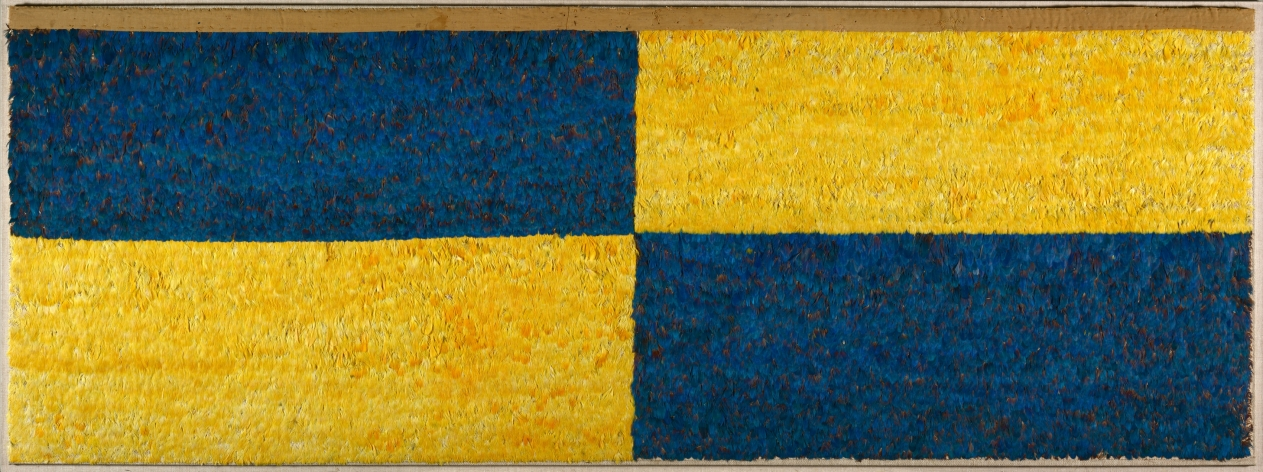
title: Feathered Panel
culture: Peru, Far South Coast, Pampa Ocoña, 7th-10th century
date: 600–900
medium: Papagayo macaw feathers knotted onto strings and stitched to cotton plain-weave cloth; camelid fiber plain-weave cloth upper tape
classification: Textile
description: Of all the luxury textile types made in the ancient Andes, feathered cloth was one of the most esteemed. This panel may come from a buried offering that contained more than a half-dozen large human-effigy vessels made of ceramic; inside the vessels were 96 rolled panels, all covered with the feathers of the tropical blue-and-yellow macaw. The ties that survive on the upper corners of some panels suggest they served as hangings that transformed a space from mundane to radiant and ceremonial.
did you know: This panel is entirely covered in the feathers of blue and yellow macaws.